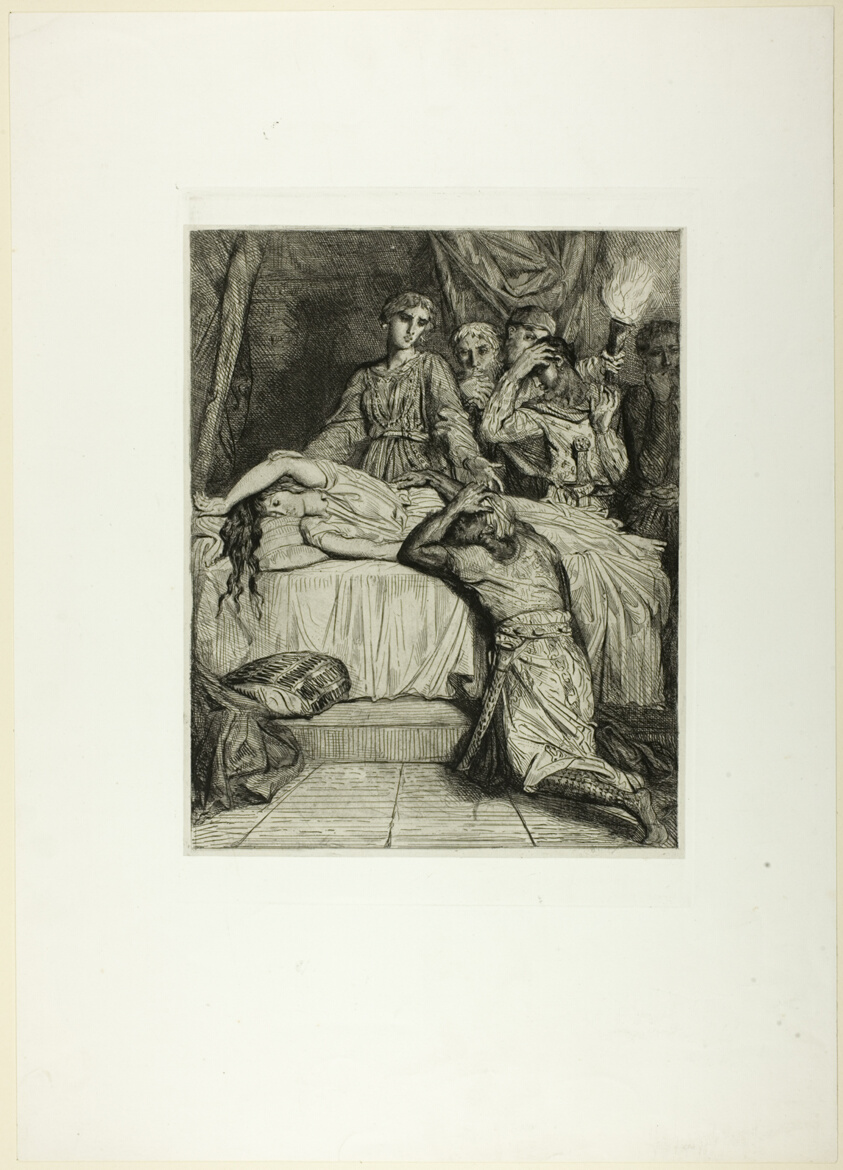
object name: Print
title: Oh! Oh! Oh!, plate fourteen from Othello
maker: Théodore Chassériau (French, 1819-1856)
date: 1844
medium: Etching, engraving and roulette on off-white China paper, laid down on white wove paper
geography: France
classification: etching; print; prints and drawing